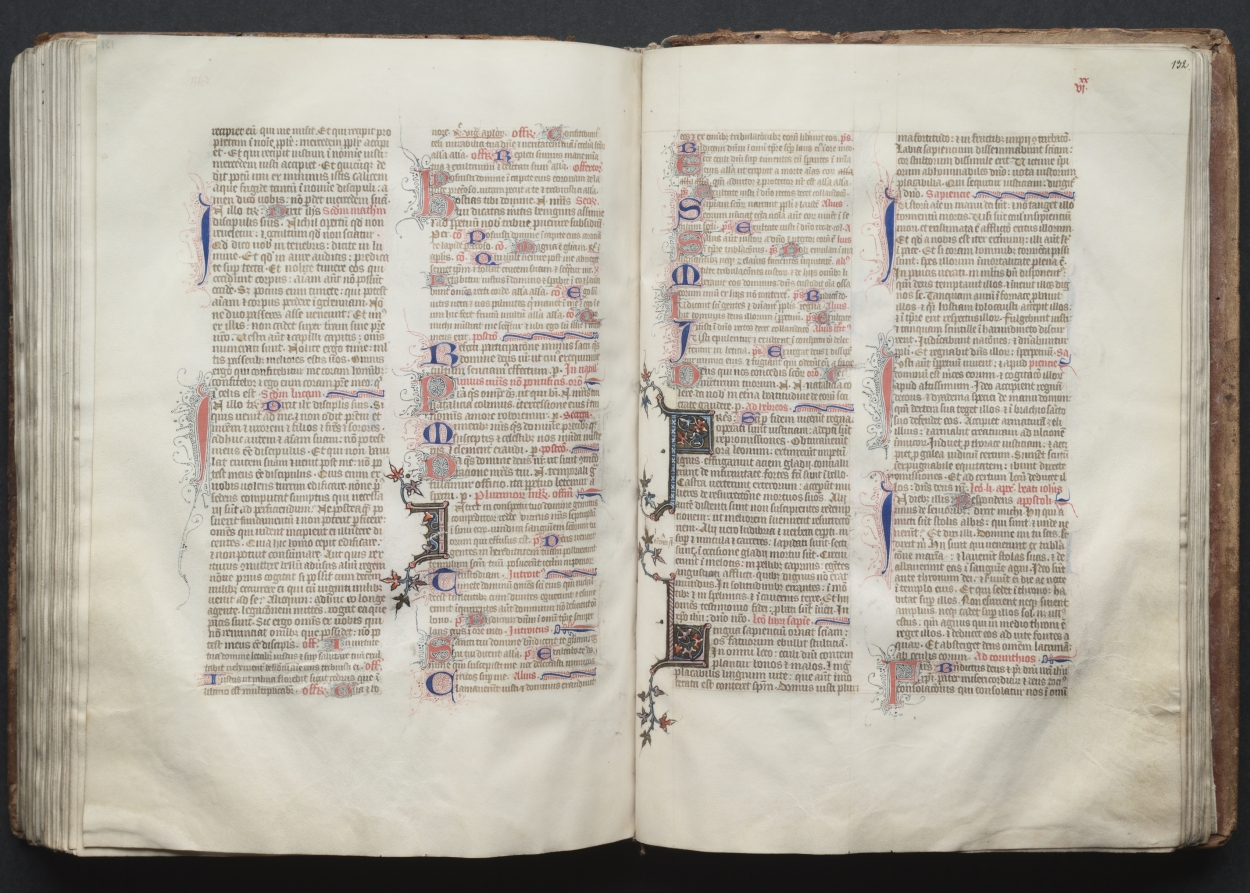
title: The Gotha Missal: Fol. 131v, Text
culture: France, Paris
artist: Master of the Boqueteaux (French)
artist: and Workshop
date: c. 1375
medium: ink, tempera, and gold on vellum; blind-tooled leather binding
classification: Bound Volume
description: The style and quality of this manuscript's decoration is typical of deluxe Parisian books made for aristocratic or royal patrons. Most of the book's decoration appears to be the work of the Master of the Boqueteaux, an artist active at the court of King Charles V (died 1380). His style was apparently shared by a number of book illuminators working in and around Paris. It is very possible that the Gotha Missal belonged to Charles V, but is not provable because the manuscript has no royal portraits and lacks a colophon. Given the book's magnificent decoration, however, it would seem that it was produced for a Valois prince, if not for the king himself. The manuscript receives its name from the German dukes of Gotha, its later owners.